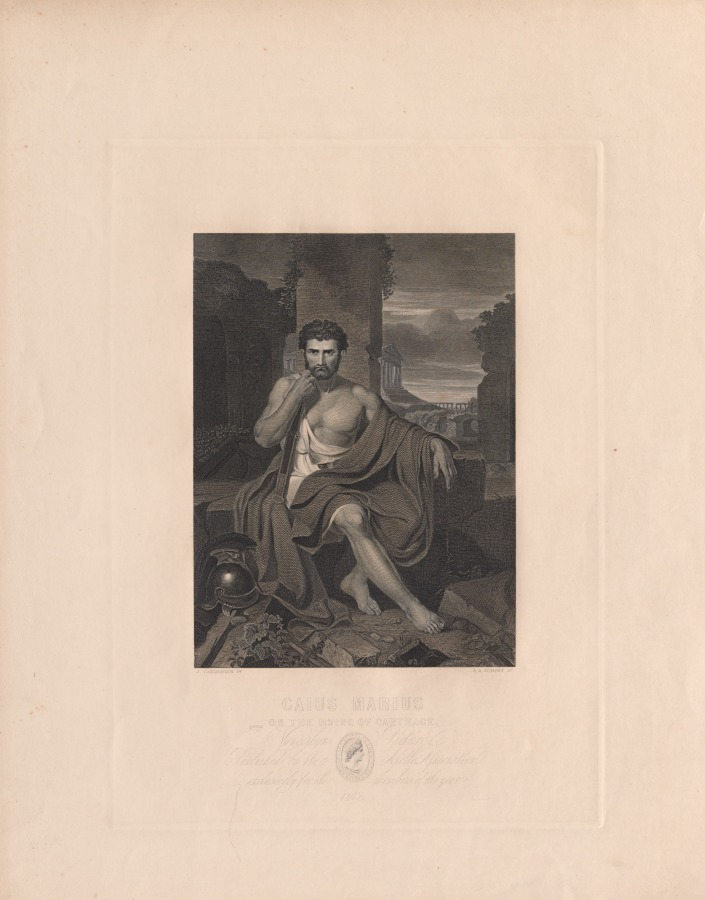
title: Caius Marius on the Ruins of Carthage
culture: America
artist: Stephen Alonso Schoff (American, 1818–1905)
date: 1842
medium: engraving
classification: Print